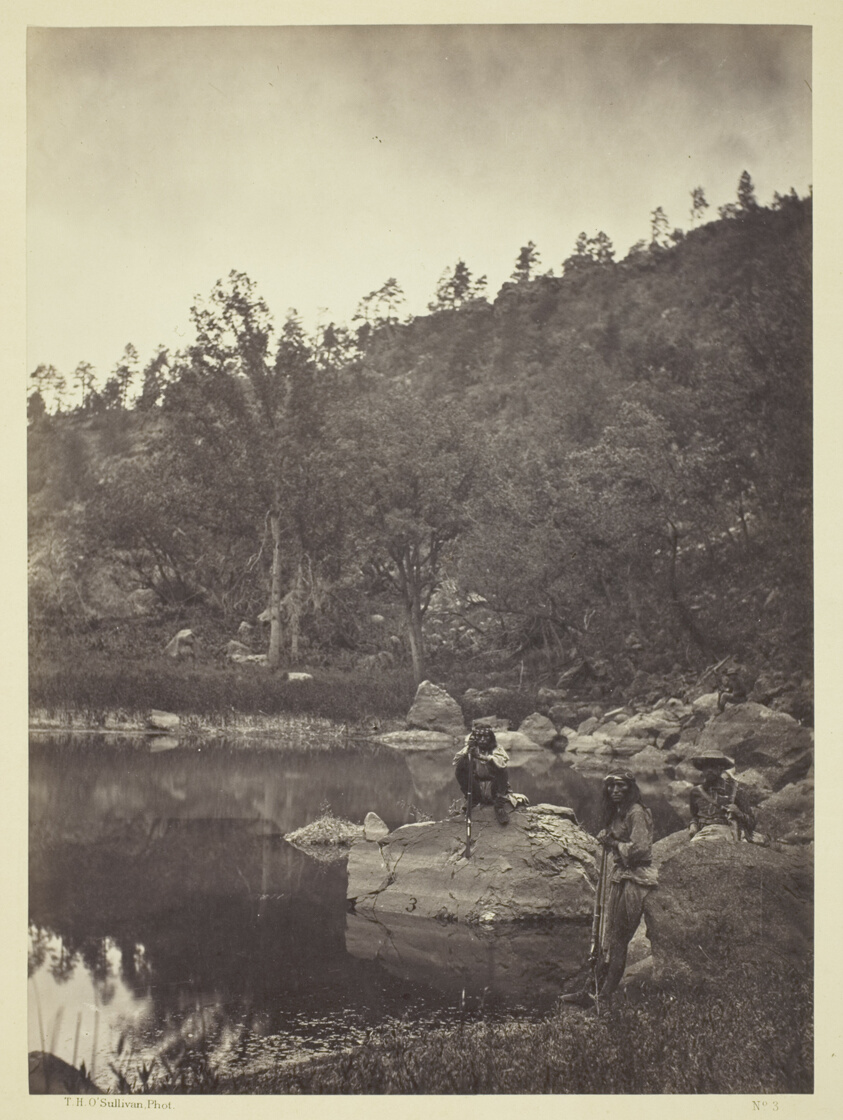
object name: Photograph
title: View on Apache Lake, Sierra Blanca Range, Arizona, Two Apache Scouts in the Foreground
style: 19th century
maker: Timothy O'Sullivan (American, born Ireland, 1840–1882)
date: 1873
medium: Albumen print, from the album "Geographical & Geological Explorations & Surveys West of the 100th Meridian," vol. 1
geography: United States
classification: albumen silver print; photographic process; photography; photograph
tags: Collected by Hugh Edwards